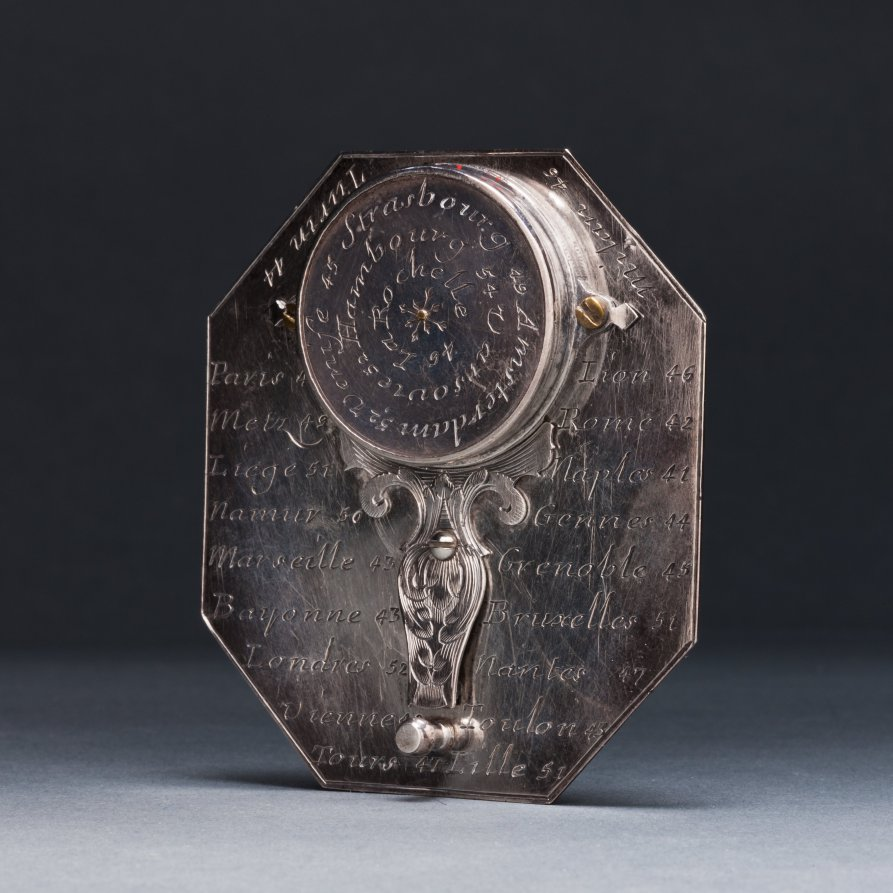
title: Butterfield Sundial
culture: France, 18th century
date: 1700s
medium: silver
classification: Silver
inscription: [Engraved signature above the compass in ribbon band]: "N. BION A Paris"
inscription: [Engraved on the face of the sundial]: “Pour 55° 4-5-6-7-8-9-10-11 50° IIII-V-VI-VII-VIII-IX-X-XI 45° 5-6-7-8-9-10-11 40° -VI-VII-VIII-IX-X-XI'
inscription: [Engraved on the other side]: "Pour 55° -8-7-6-5-4-3-2-1-0 50°-VIII-VII-VI-V-IIII-III-II-I 45°-8-7-6-5-4-3-2-1 40°-VII-VI-V-IIII-III-II-I"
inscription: [Engraved around the compass]: “NORD-OUEST-SUD-EST”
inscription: [Engraved on the back of the sundial]: “Turin 44 Milan 46 Paris 49 Lion 46 Metz 49 Rome 42 Liege 51 Naples 44 Namur 50 Gennes 44 Marseille 43 Grenoble 45 Bayonne 43 Bruxelle 51 Londres 52 Nantes 47 Vienne 48 Toulon 43 Tours 47 Lille 51”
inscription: [Engraved around the back of the compass]: “Venise 45 Strasbourg 49 Amsterdam 52 Hambourg 54 Varsovie 52 La Rochelle 46”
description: Butterfield-type sundials are characterized by their adjustable gnomons, metal flaps that cast a shadow on the dial’s face to indicate the hour, and geographical indices. This sundial has a scale adjustable between latitudes of 40° to 60° north. The latitudes of 26 European towns are engraved on its back for quick reference. With an intricately engraved silver face, it would have functioned as a fashionable traveler’s accessory.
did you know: Butterfield-style sundials were named after Micheal Butterfield, an English scientific and mathematical instrument maker who worked in Paris between 1674 and 1724.